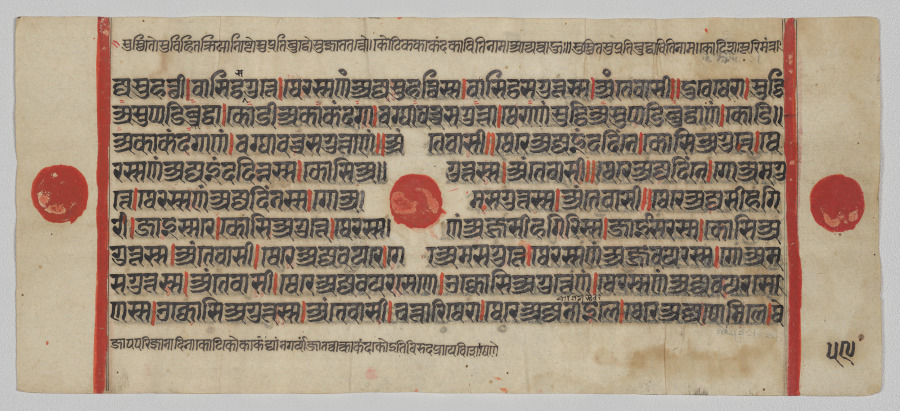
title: Text, Folio 59 (verso), from a Kalpa-sutra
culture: Western India, Gujarat, last quarter of the 15th century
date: c. 1475–1500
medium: Gum tempera, ink, and gold on paper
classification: Painting